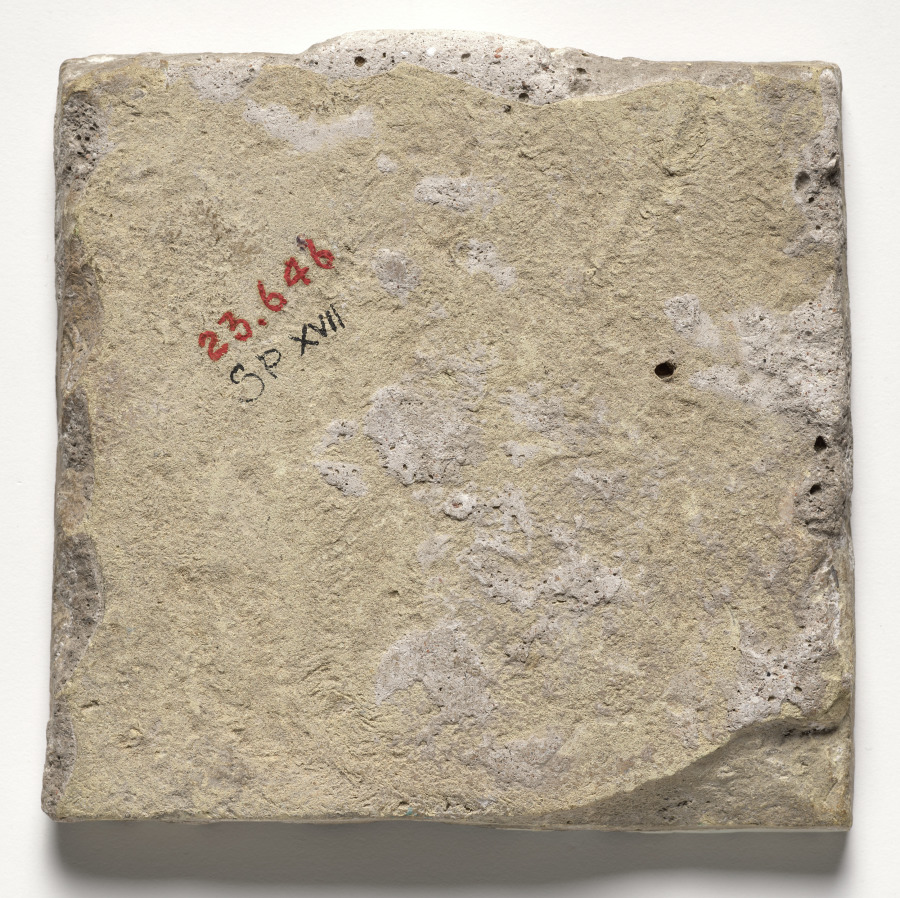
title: Wall Tile–Tree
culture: Spain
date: c. 1600s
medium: glazed ceramic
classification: Ceramic